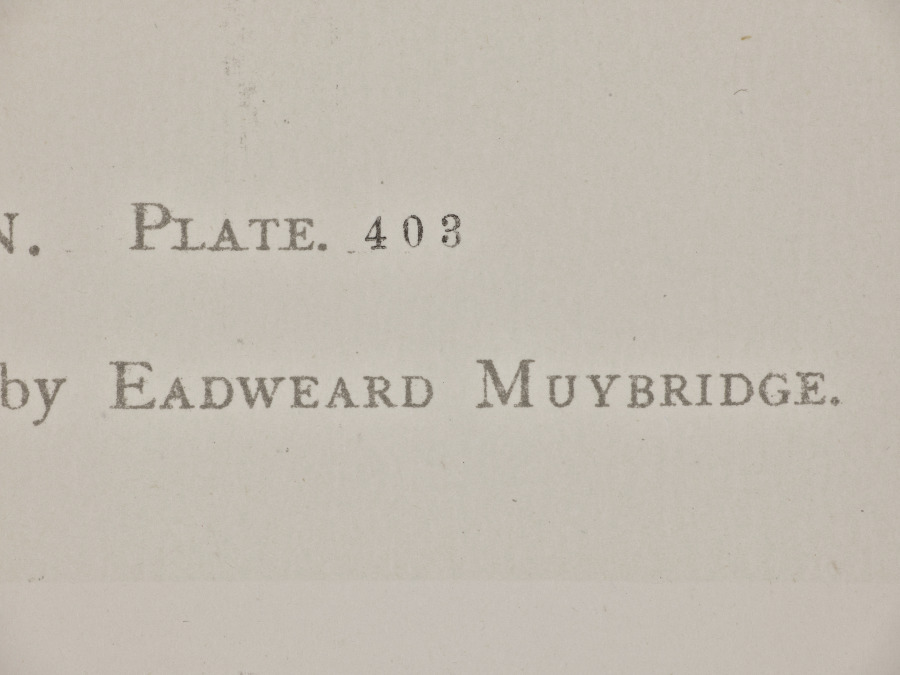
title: Emptying a Bucket of Water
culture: America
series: Animal Locomotion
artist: Eadweard J. Muybridge (American, 1830–1904)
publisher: University of Pennsylvania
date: 1887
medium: collotype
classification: Photograph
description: Eadweard J. Muybridge initially used horses to capture motion as separate slices of time faster than the human eye could perceive them, then moved on to study other animal and human movements. Everyday activities, like emptying a bucket of water, were broken down and sequenced back-to-back. This series was commissioned by the University of Pennsylvania and intended to diagnose dysfunction in human movement by allowing each consecutive action to be studied in isolation. The university’s desire for distribution called for the use of collotype. The process had been recently improved to the point where editions of up to 1,000 were possible, making it an attractive option for publishers.